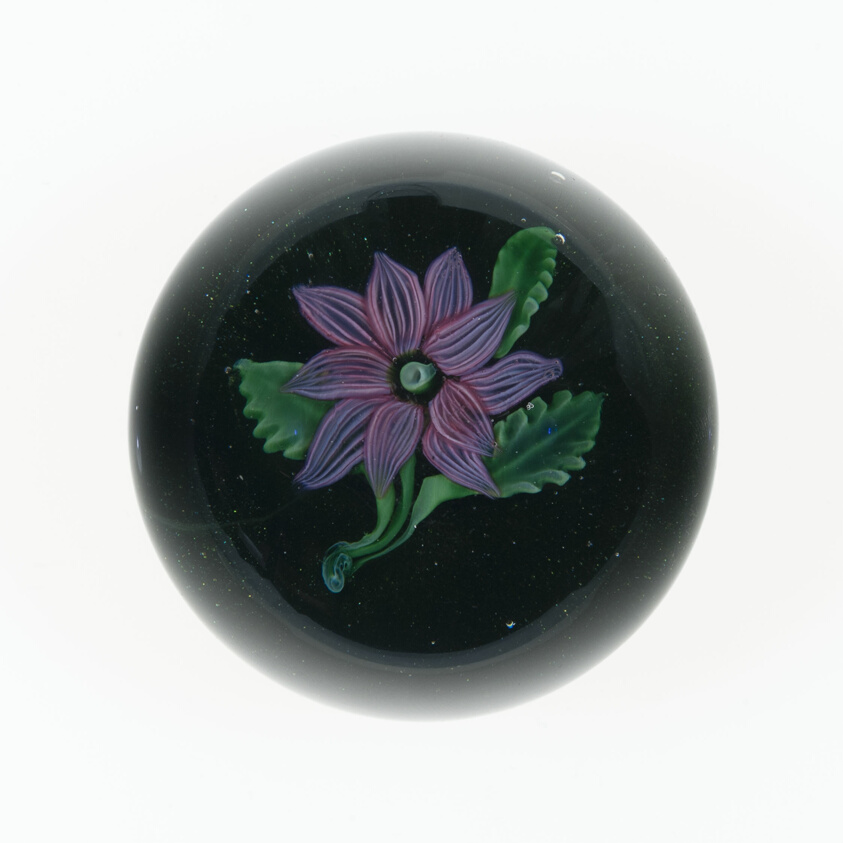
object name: Glass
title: Paperweight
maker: Saint-Louis Glassworks (Cristalleries de Saint-Louis); Lorraine, France, founded 1586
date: c. 1845–60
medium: Glass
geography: Saint-Louis-lès-Bitche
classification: paperweight; glass